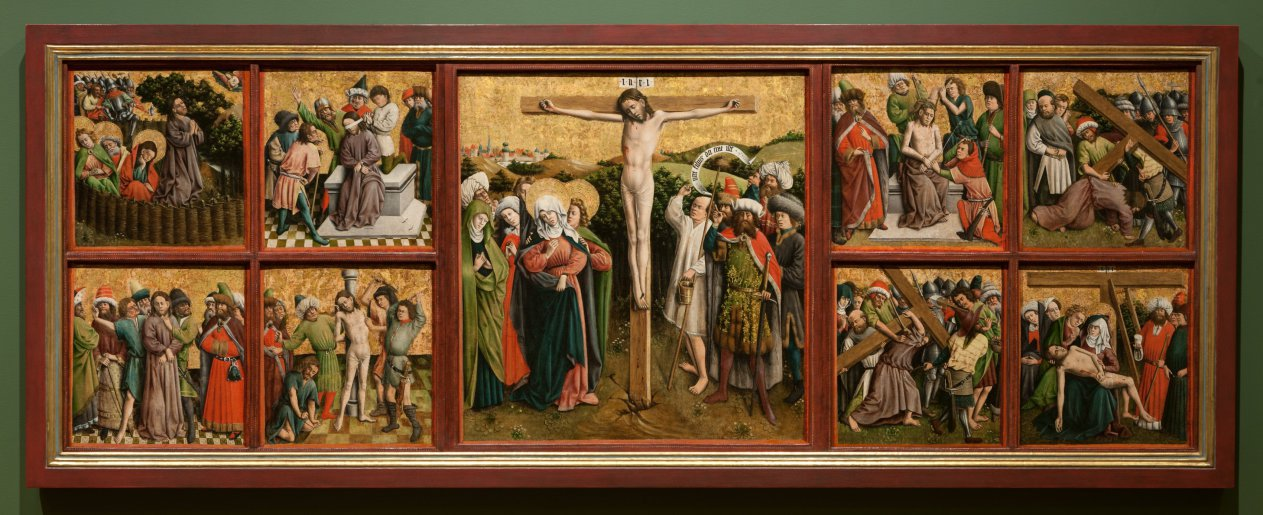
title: Altarpiece with The Passion of Christ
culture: Germany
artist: Master of the Schlägl Altarpiece (German)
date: c. 1440s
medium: oil and gold on wood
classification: Painting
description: The visual focus of this altarpiece is the suffering and death of Christ on the cross. So-called Passion cycles in art include the events leading up to and following the Crucifixion, not only as single subjects but as scenes meant to be read in sequence. Passion cycles were promoted by the two great teaching orders, the Franciscans and the Dominicans, for whom this subject represented the main religious drama of their churches, and also by the German mystics who advocated private contemplation on the humanity and suffering of Christ. The original context for this altarpiece remains unknown, but it was probably made for a religious institution in Westphalia in the Rhine Valley. During the 1870s it was given to the Abbey of Schlägl, near Linz in Upper Austria, from which both altarpiece and artist take their names. The altarpiece is not preserved today in its original format, and some of the individual scenes are missing. Scholars continue to debate the original number of scenes and their sequencing; nine of the original panels have survived.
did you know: In 2012 the museum's conservation department created a new frame that was stylistically more appropriate for this altarpiece.